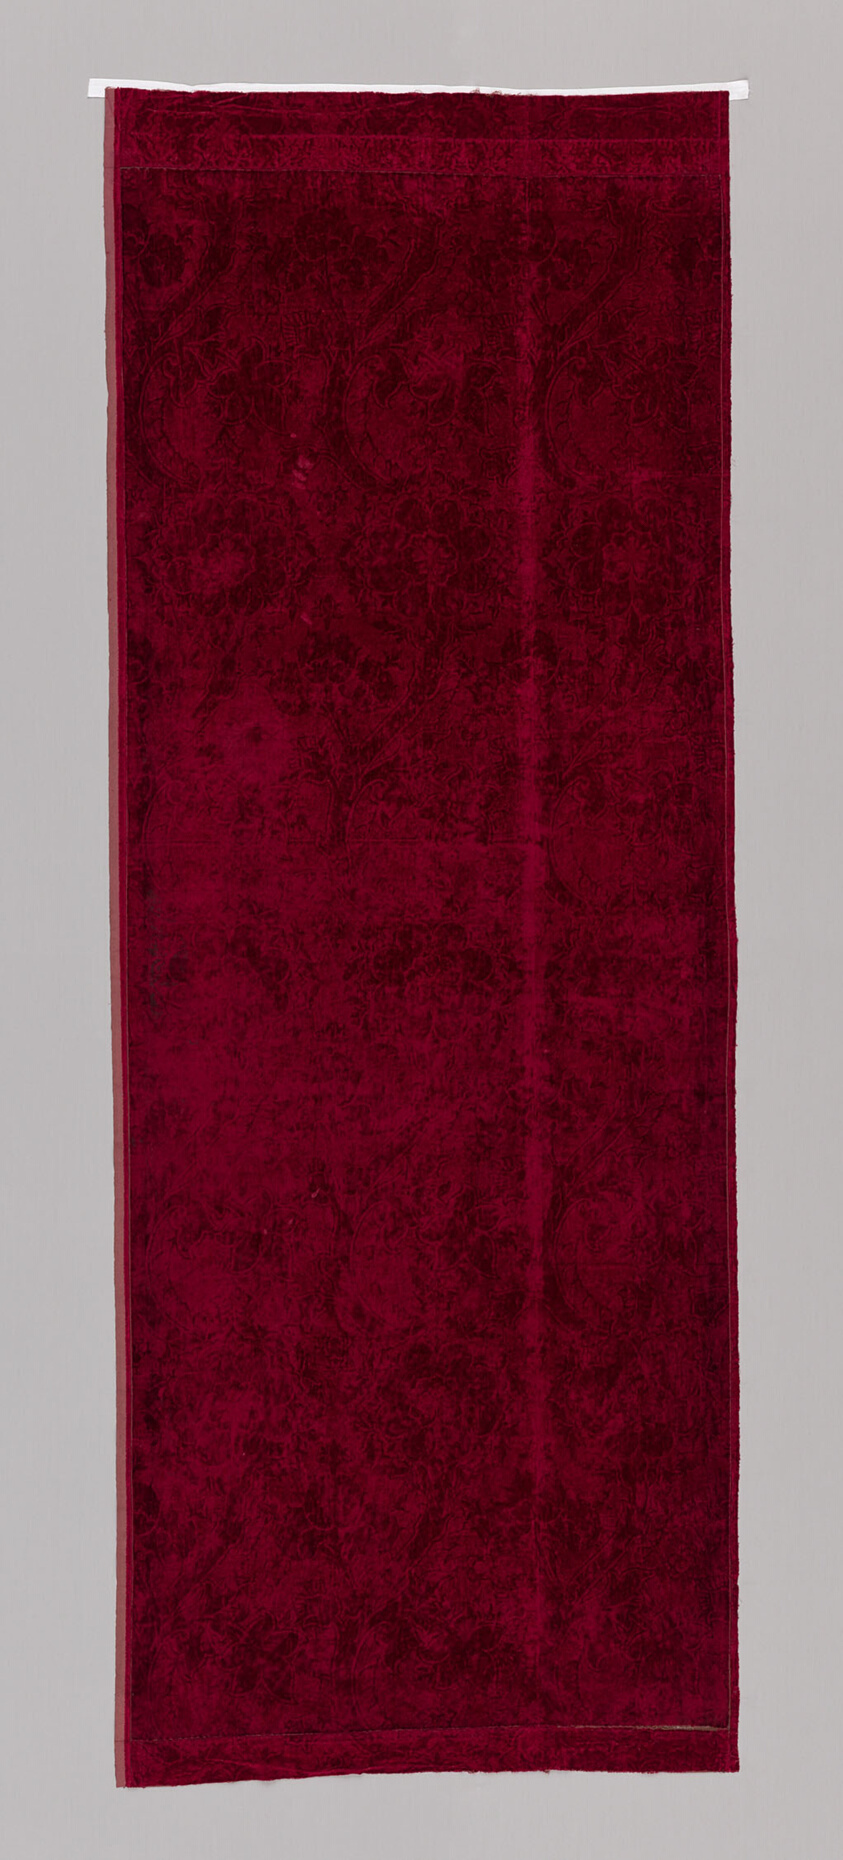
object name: Textile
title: Utrecht Velvet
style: Arts and Crafts Movement, british, 19th century, British Arts and Crafts Movement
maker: Attributed to William Morris (English, 1834–1896); Produced by Morris & Co., London (English, 1875–1940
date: Design c. 1871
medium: Cotton and silk, plain weave with supplementary pile warps forming cut solid velvet; stamped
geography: England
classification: textile; weaving - velvet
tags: foliage